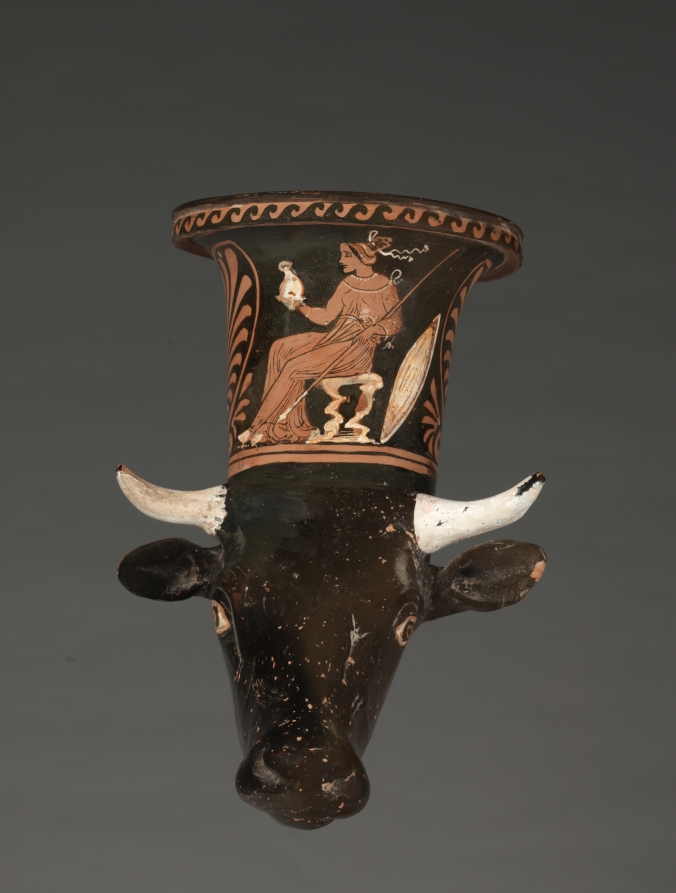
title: Red-Figure Cow-Head Rhyton (Drinking Horn): Seated Woman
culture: South Italian, Apulian, Tarentine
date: c. 340 BCE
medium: ceramic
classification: Ceramic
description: Rhyta (drinking horns) in the forms of animal heads were popular ceramic products in Apulia c. 350-320 BC. Mold-made heads were attached to wheel-made bowls, with separately made handles (plus ears and horns, for this cow). On the bowl, a seated woman holds a helmet and spear, with a shield nearby; she may represent Athena, although the helmet differs from her usual type and she does not appear to wear her snaky aegis (breastplate).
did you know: The cow-head rhyton was the most popular of all Apulian animal-head rhyta.